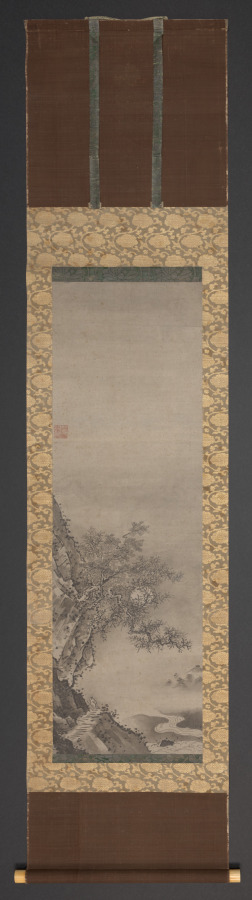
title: Landscapes with Figures (one of a pair)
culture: Japan, Muromachi period (1392–1573)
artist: Shūgetsu Tōkan (Japanese, 1440?-1529)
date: c. 1500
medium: hanging scroll; ink on paper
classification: Painting